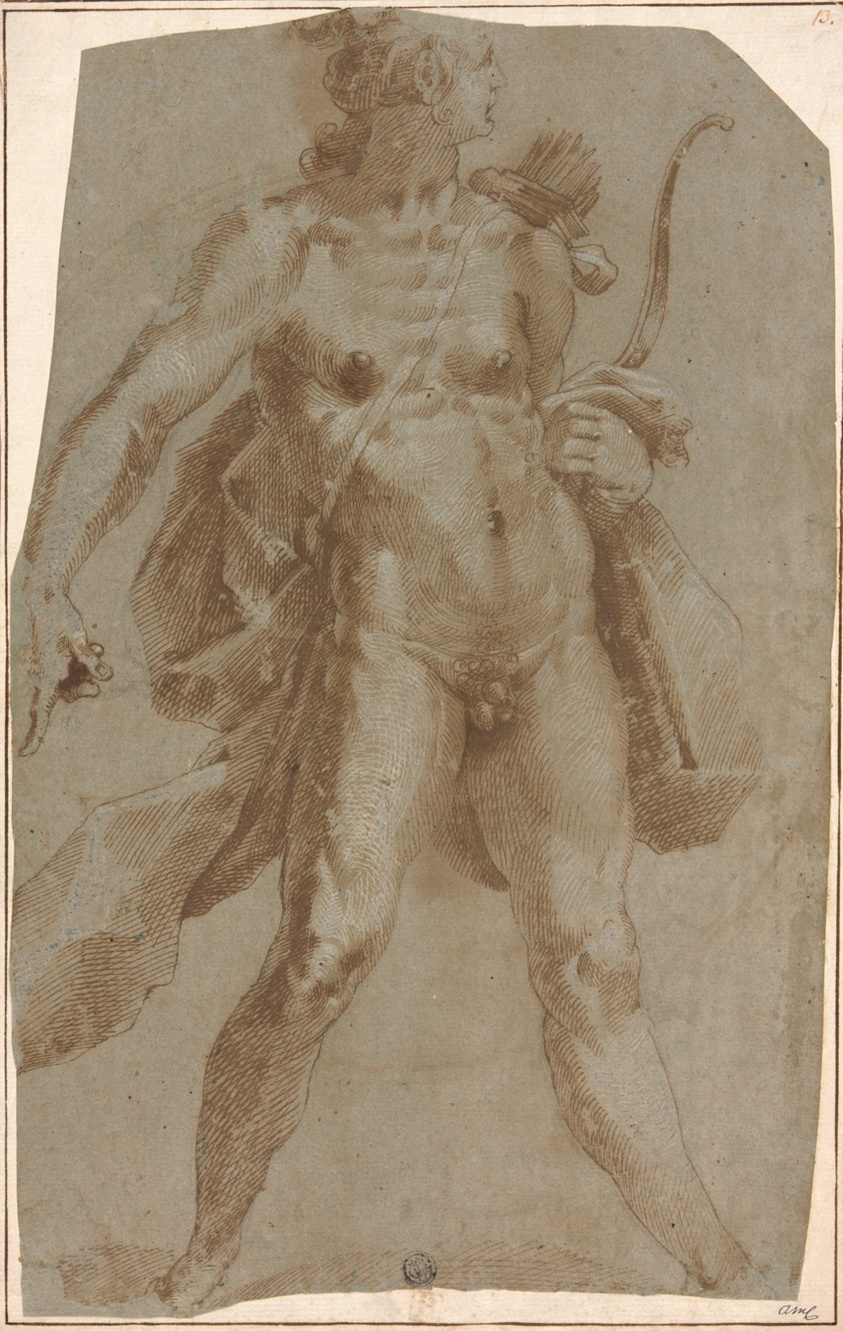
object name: Drawing and Watercolor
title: Apollo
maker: After Jan Harmensz Muller; Dutch, 1571-1628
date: c. 1600-1620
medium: Pen and brown ink, heightened with lead white (partly discolored), over black chalk, on blue laid paper, laid down on ivory laid paper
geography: Netherlands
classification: pen and ink drawings; drawings (visual works); prints and drawing